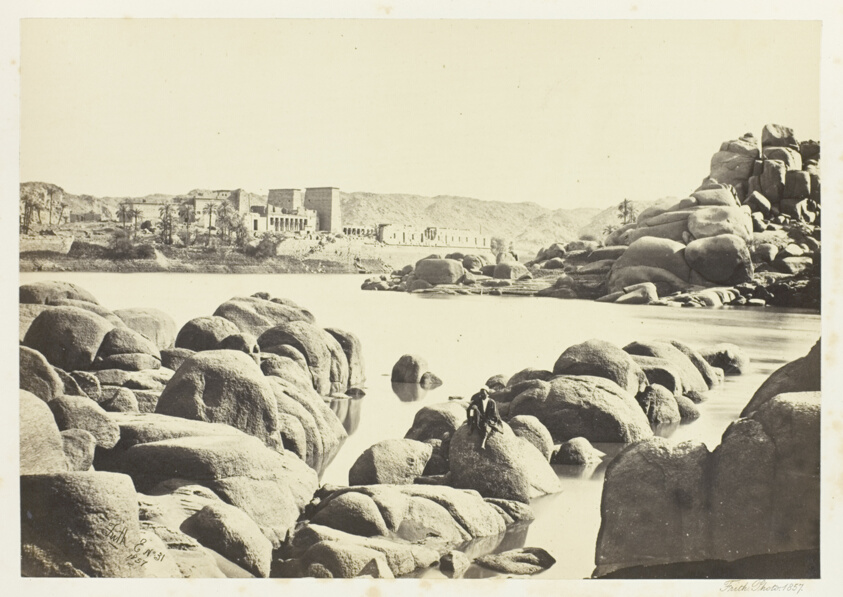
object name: Photograph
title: The Approach to Philæ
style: 19th century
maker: Francis Frith (English, 1822–1898)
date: 1857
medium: Albumen print, pl. 10 from the album "Egypt and Palestine, Volume II" (1858/60)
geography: England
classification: albumen silver print; photographic process; photography; photograph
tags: Collected by Hugh Edwards, Egypt and Palestine